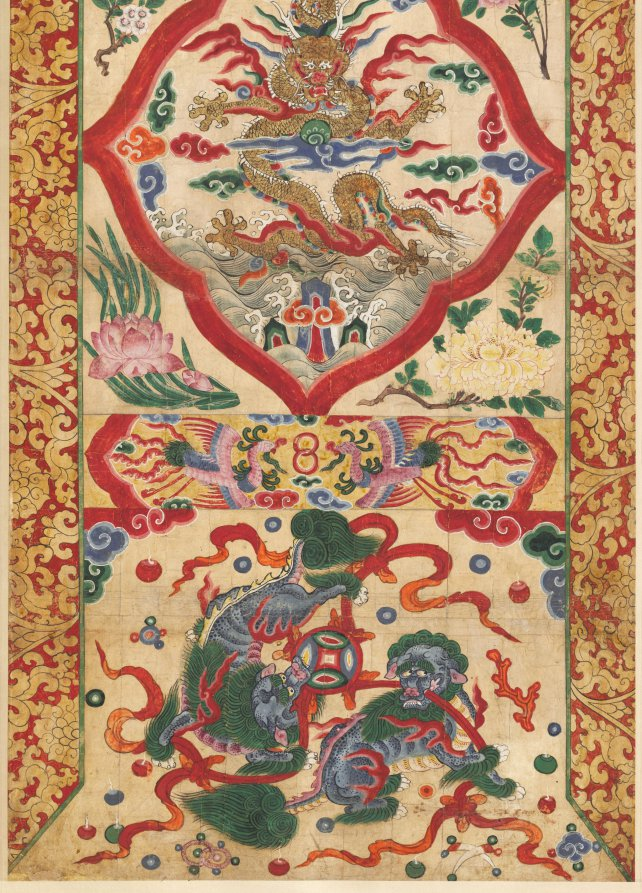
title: Painted Panel of Character "Whistle"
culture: Korea, Joseon dynasty (1392–1910)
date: early 1900s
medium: hanging scroll, ink and color on paper; unmounted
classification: Painting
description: This set of four colorful hanging scrolls may have been used in an outdoor Buddhist ritual to evoke heavenly blessings. Each hanging scroll bears four different character; tiger, dragon, whistle, and recite. Traditionally, tiger and dragon belong to the four directional guards, respectively west and east.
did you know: This set of four colorful hanging scrolls may have been used in an outdoor Buddhist ritual to evoke heavenly blessings.